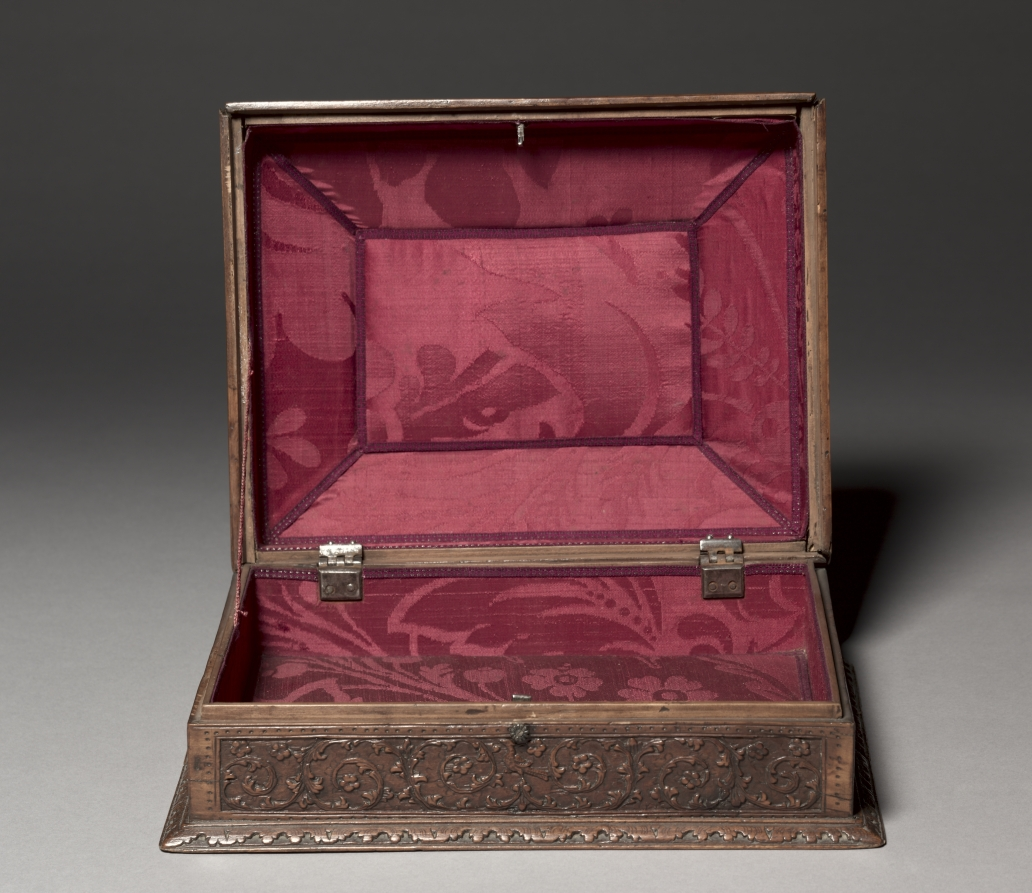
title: Box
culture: France, late 17th century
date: late 1600s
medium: wood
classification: Furniture and woodwork